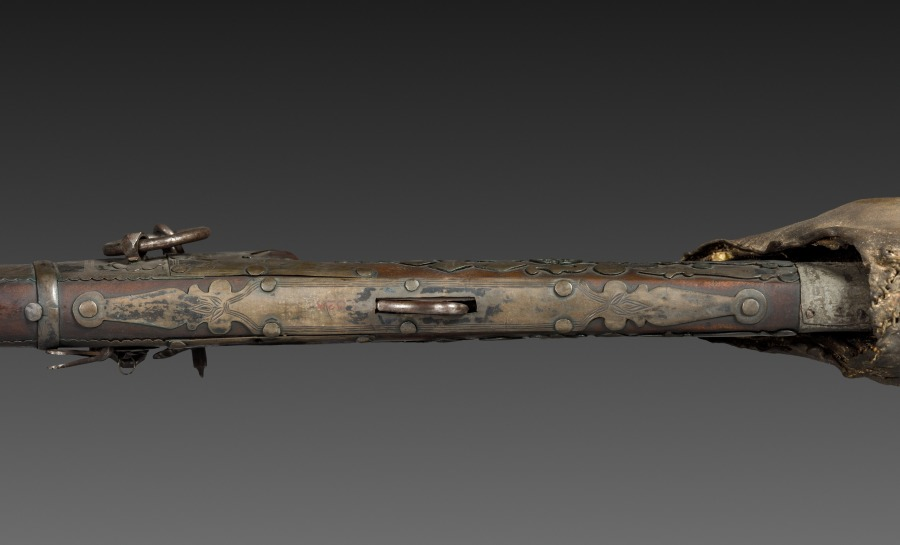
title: Matchlock Musket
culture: Turkey, Ottoman period (1299–1922)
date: c. 1750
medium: Wood, steel, brass, mother-of-pearl inlay, and leather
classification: Arms and Armor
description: Collectively, the Safavid, Mughal, and Ottoman empires are known as the Gunpowder Empires. Particularly from the 1500–1700s, they were among the strongest economic, cultural, and militaristic powers. Each trained and equipped their armies with the latest gunpowder firearms, particularly cannons and muskets. While used in battle, muskets were also used for leisure activities, particularly hunting. The decoration on this musket suggests it was a courtly item, fitted with a leather pad to protect the shooter from the force of the explosion after firing.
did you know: A matchlock musket was loaded from the muzzle end with a scouring stick kept in a sleeve on the underside of the barrel.